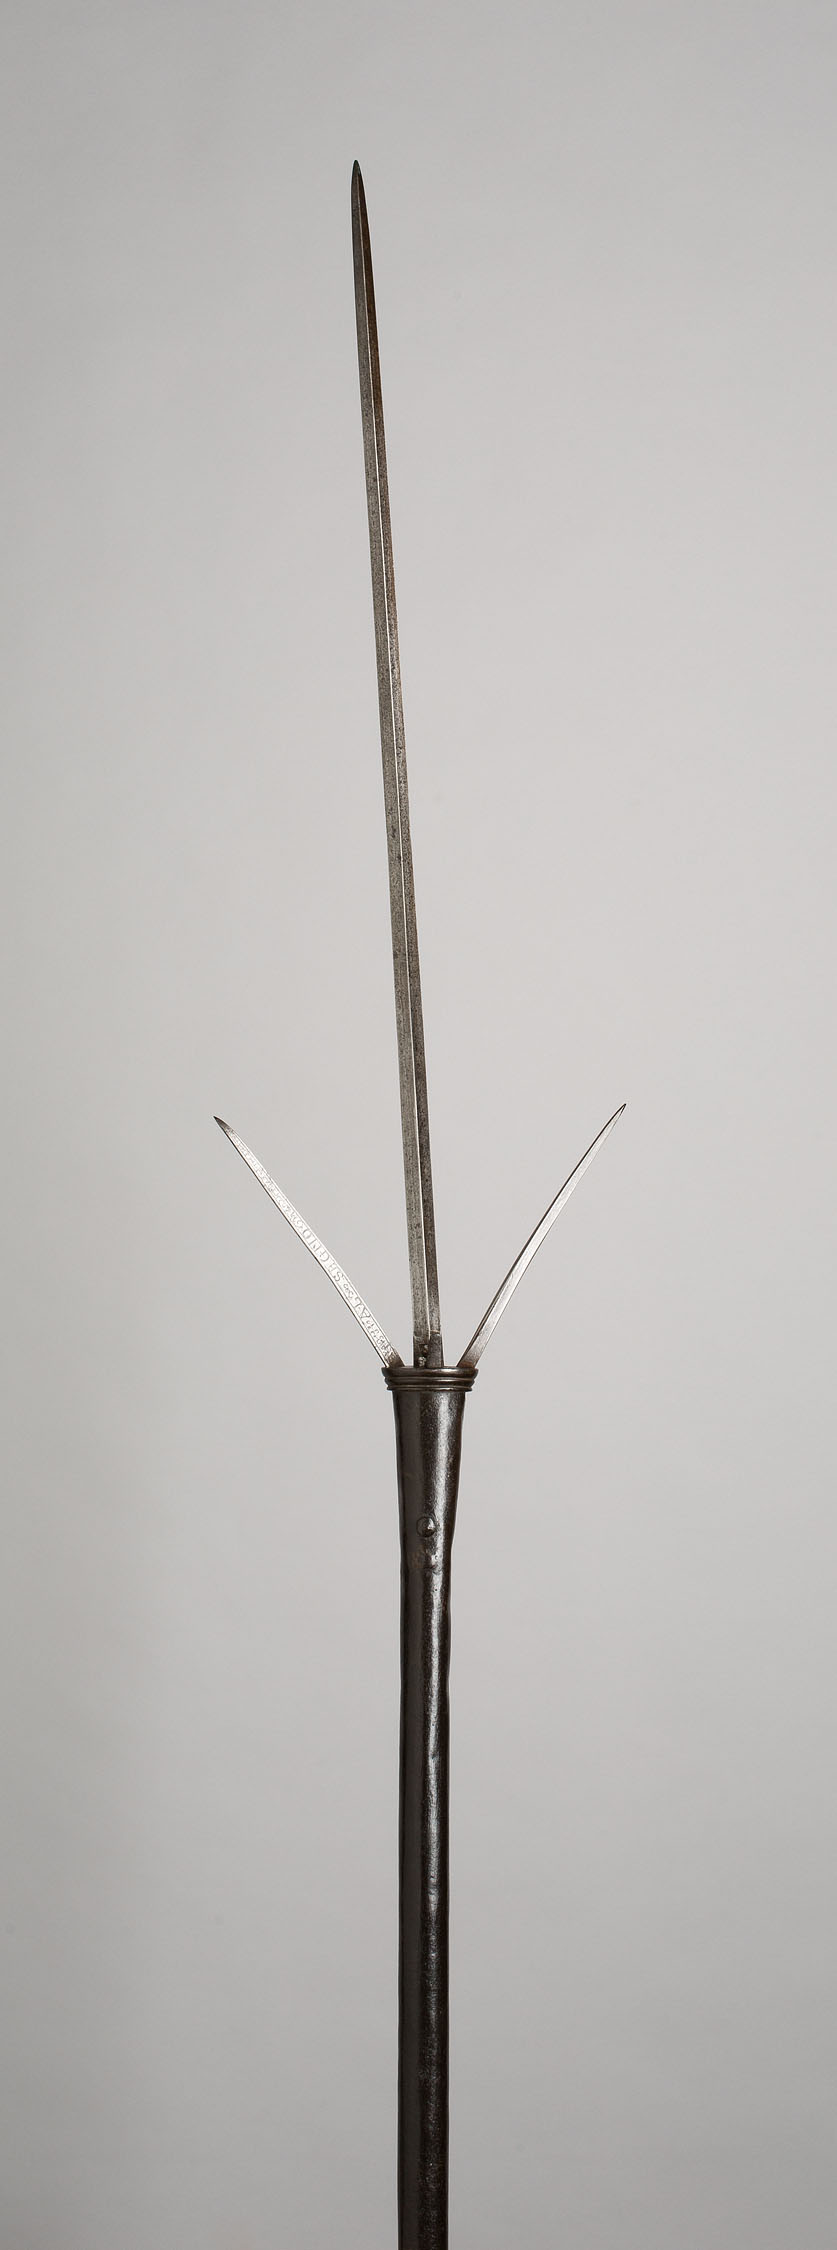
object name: Arms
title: Brandistock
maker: Italian (Milanese)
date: 1580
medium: Iron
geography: Northern Italy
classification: edged weapon-staff; combination weapon; arms; arms and armor